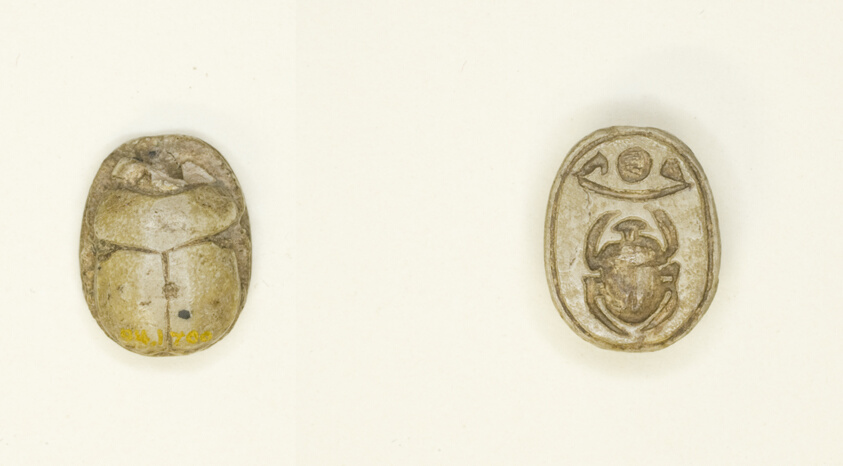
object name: Costume and Accessories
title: Scarab: Wish Formula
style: new kingdom, ancient, egyptian, eighteenth dynasty, nineteenth dynasty, twentieth dynasty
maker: Egyptian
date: New Kingdom, Dynasties 18–20 (about 1550–1069 BCE)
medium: Steatite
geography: Egypt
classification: scarab; ancient art; costume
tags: Hieroglyphs, boats, gods (deities), insects, sun, suns